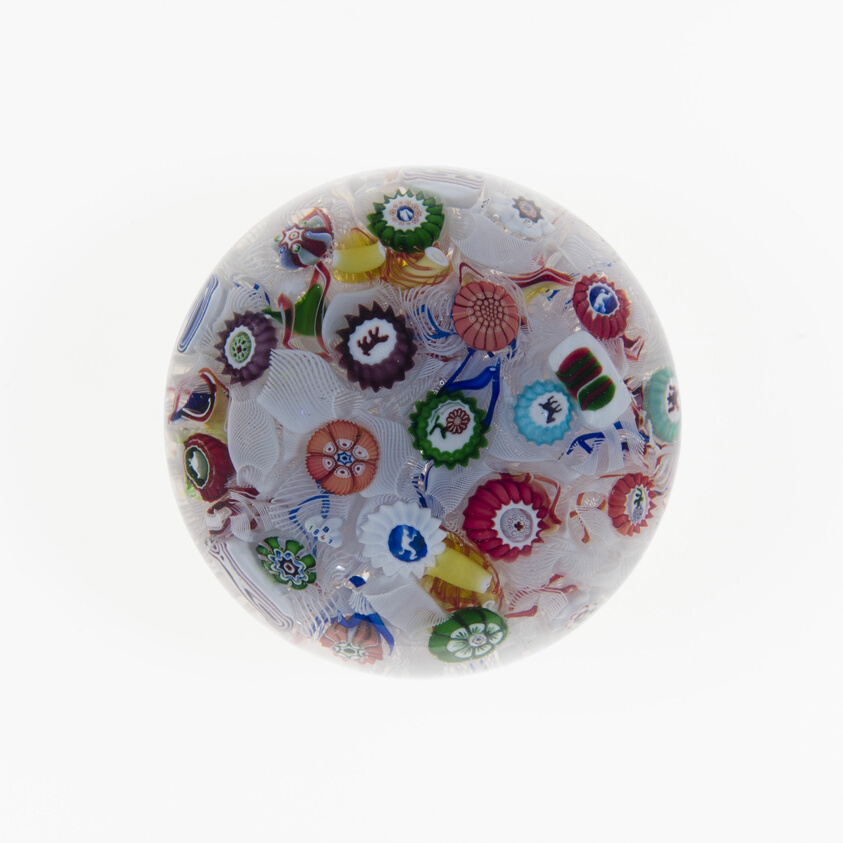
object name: Glass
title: Paperweight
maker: Baccarat Glassworks (Cristalleries de Baccarat); Lorraine, France, founded 1764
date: 1847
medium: Glass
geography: Lunéville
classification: paperweight; millefiori; european decorative arts; glass